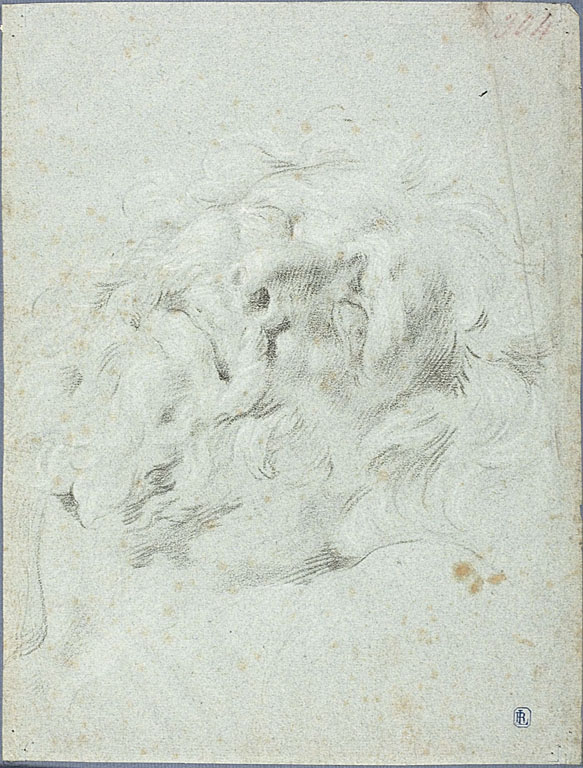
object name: Drawing and Watercolor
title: Head from Laocoon Group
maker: Anton Domenico Gabbiani (Italian, 1652-1726)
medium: Black and white chalk, on blue laid paper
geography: France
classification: chalk; drawings (visual works); prints and drawing